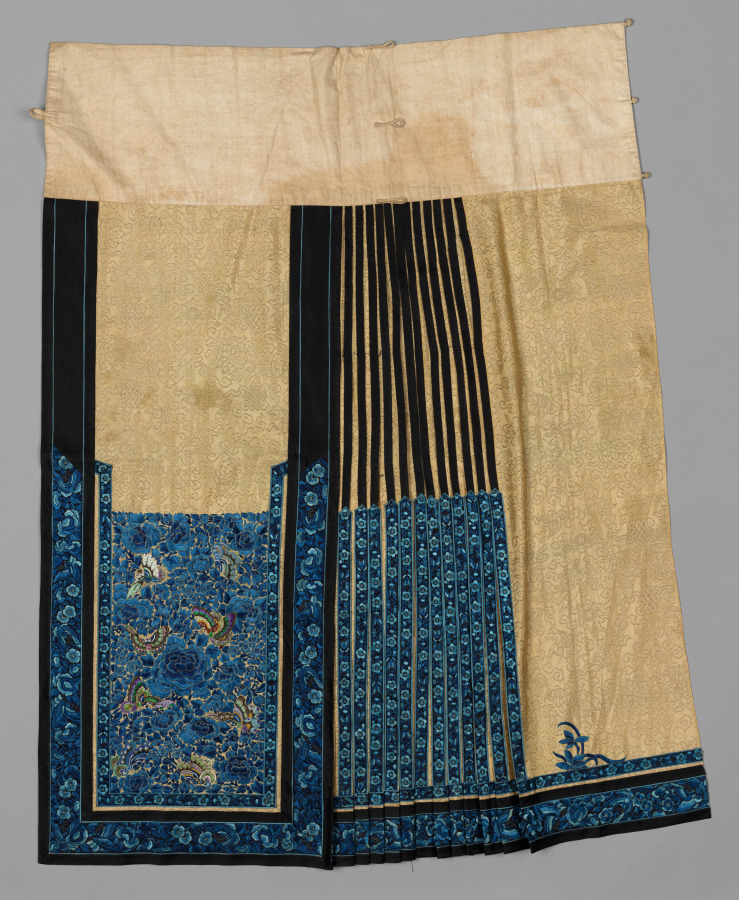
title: Skirt (Part 1)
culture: China, Qing dynasty (1644–1911)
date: late 1870s–early 1880s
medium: Silk, embroidery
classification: Garment